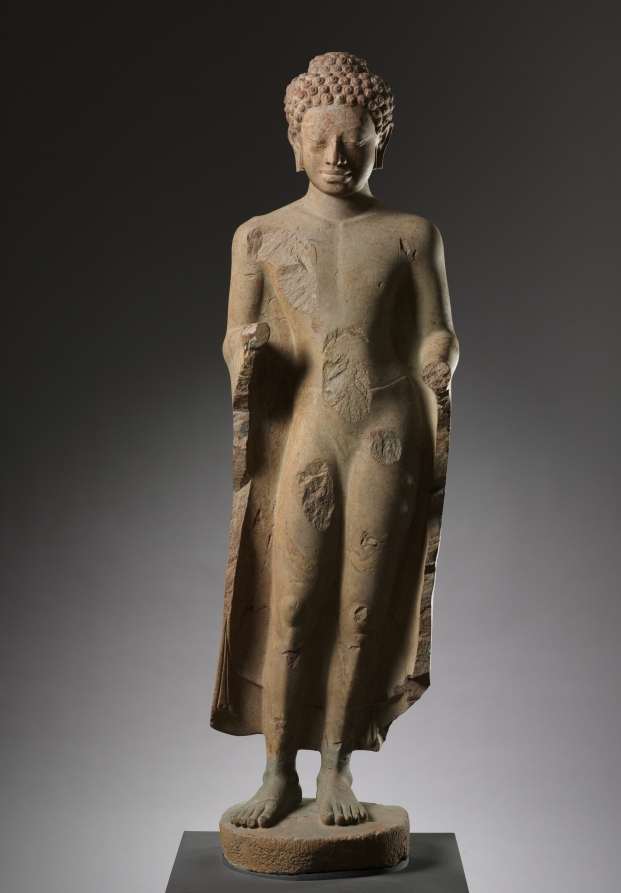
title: Buddha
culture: Thailand, probably Shri Thep, Mon-Dvaravati style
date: 600s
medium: sandstone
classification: Sculpture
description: This elegant, monumental sculpture is the earliest type of Buddha image to be made in Southeast Asia. It comes from a site in north-central Thailand that was part of the Dvaravati kingdom (500s–1200s). The body shows direct links with the sculptural traditions at Sarnath in northern India on the banks of the Ganges River. The expression of the face has the peaceful introspection that became canonical during the Gupta period of the 5th century in India. The shape of the head and facial features—unlike Indian precursors—suggest that the artists and patrons of Dvaravati made the Buddha resemble the local Mon population. The figure's stance has been rendered with remarkable fluidity, and the abstracted caps of the knees and minimalist modeling of the pelvis lend the figure an otherworldly, transcendent demeanor, balanced by the approachable smiling countenance.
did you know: Now reunited for display, CMA acquired the sculpture in two pieces, when the feet (CMA 1974.91) and the body were found in separate locations.